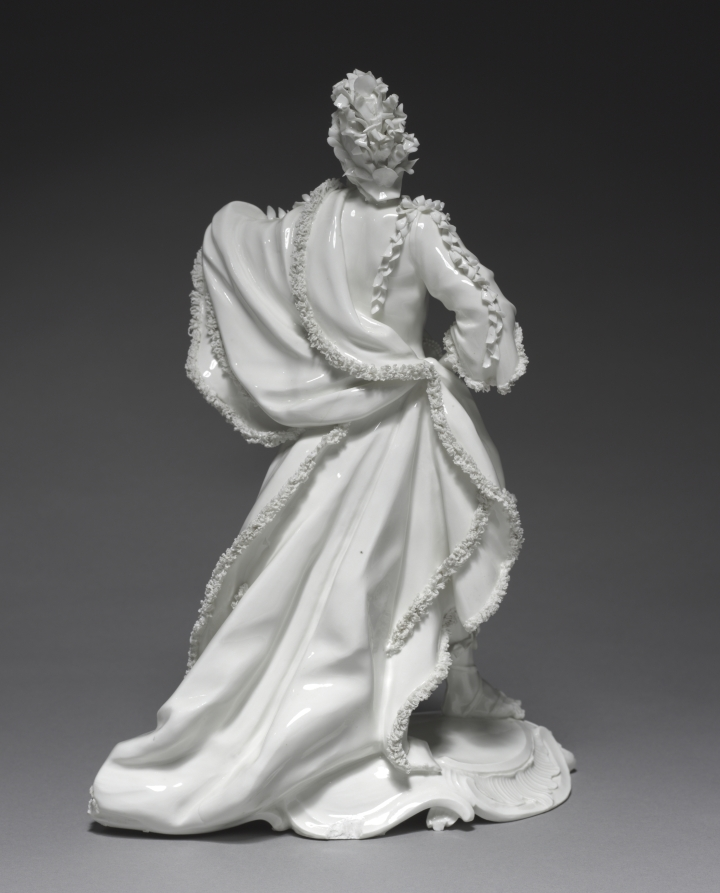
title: Oceanus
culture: Germany, Frankenthal, 18th century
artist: Frankenthal Porcelain Factory (German)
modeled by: Konrad Linck (German, 1732–1793)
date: c. 1765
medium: porcelain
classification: Ceramic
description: In Greek mythology, Oceanus was ruler of the sea before Poseidon. His counterpart in Roman mythology is Neptune